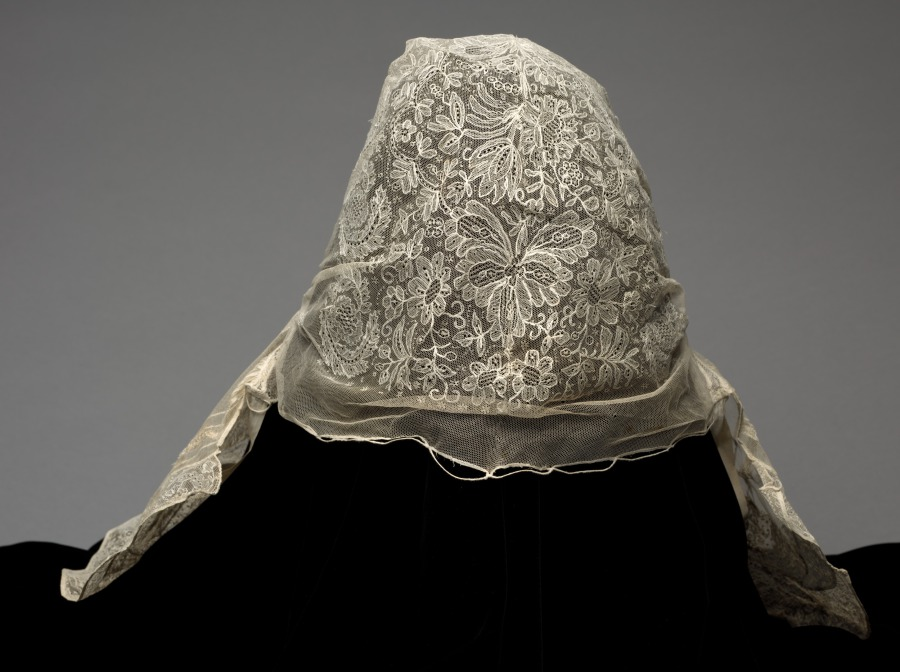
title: Lace Cap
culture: Netherlands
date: 1700s–early 1800s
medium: Lace net with embroidery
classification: Garment